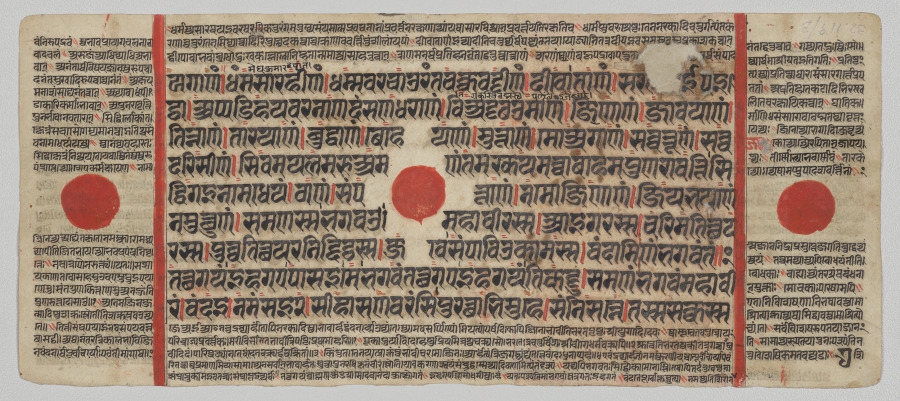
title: Text, Folio 7 (verso), from a Kalpa-sutra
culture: Western India, Gujarat, last quarter of the 15th century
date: c. 1475–1500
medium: Gum tempera, ink, and gold on paper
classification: Painting